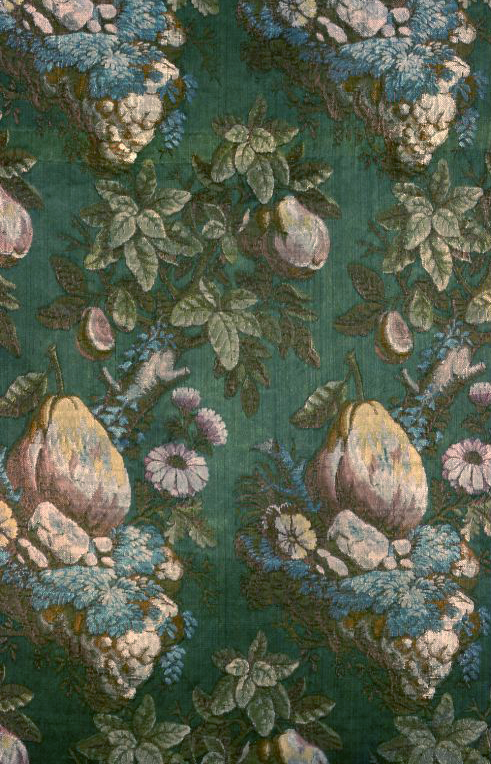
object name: Textile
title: Panel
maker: Design in the style of Jean Revel (French, 1684–1751); France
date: c. 1736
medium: Silk, satin weave with brocading wefts and secondary binding warps tying some ground wefts in plain interlacing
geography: France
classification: textile; weaving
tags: foliage, fruit